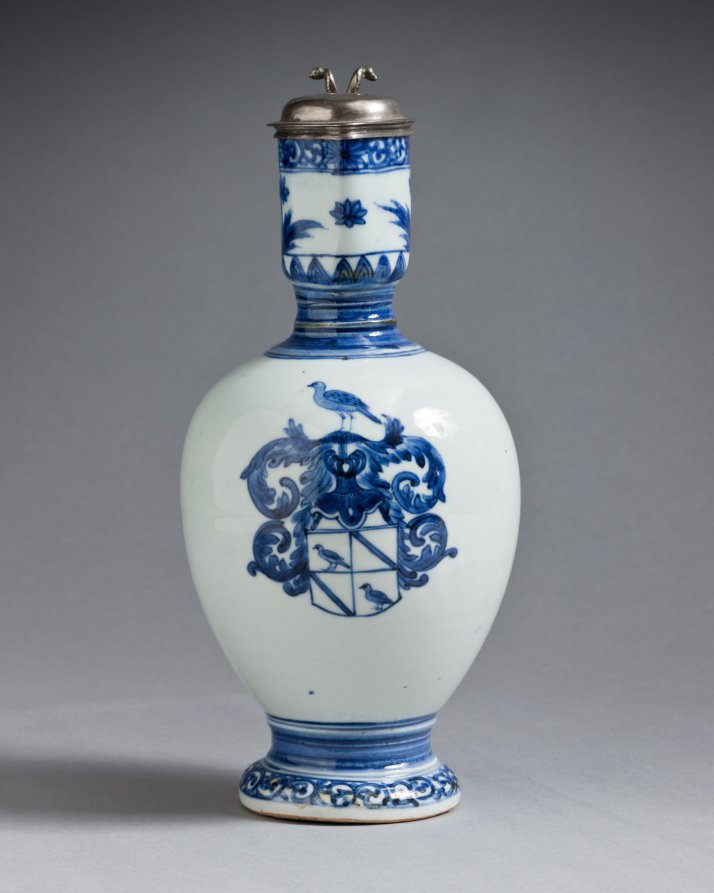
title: Jug with Silver Mounts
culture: Japan, Edo period (1615–1868)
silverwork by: Barent van Leeuwen (Dutch, 1637–1682)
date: c. 1662–76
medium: porcelain with underglaze blue decoration and silver mounts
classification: Ceramic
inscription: [on silver]: town mark for Amsterdam; lion rampant crowned (alloy mark for 0-934 silver); d (date letter for 1666), maker's mark of Barent van Leeuwen.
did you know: The coat of arms on this jug are those of the Valckenier family, active in the Dutch East India Company.